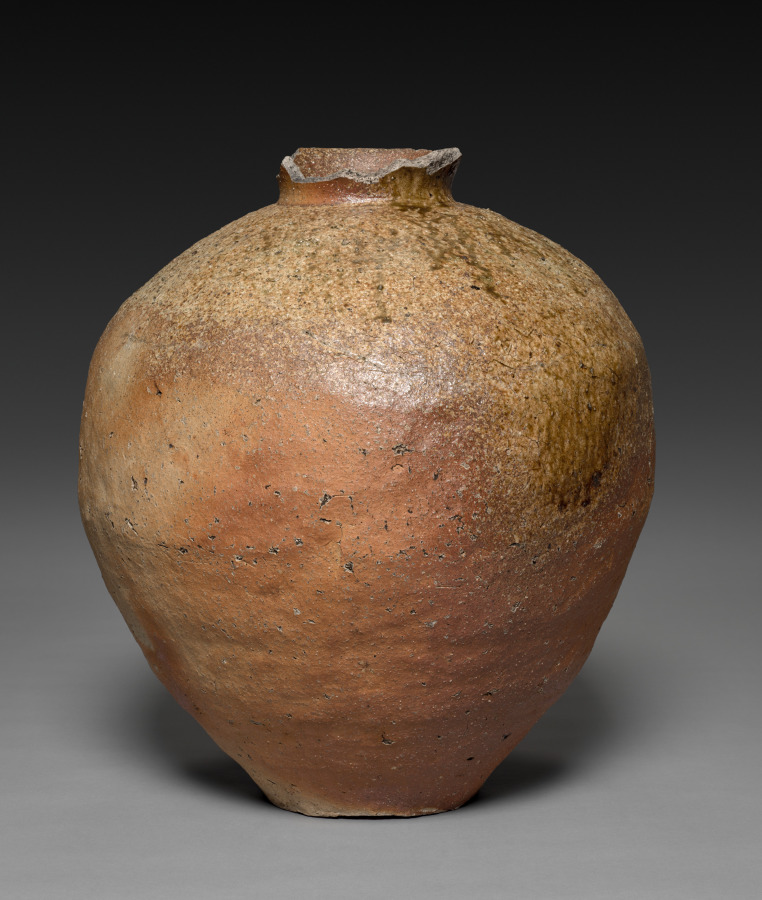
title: Storage Jar (Tsubo)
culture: Japan, Muromachi period (1392–1573)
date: 1400s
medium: stoneware with natural ash glaze (Shigaraki ware)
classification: Ceramic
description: This bulbous clay jar, with its expansive, dry orange-brown surface, white dots of feldspathic stone, and spidery crazing marks epitomizes one type of medieval ware from Shigaraki. This region east of Kyoto and north of the older cultural and religious center of Nara has long been known as a source of superior clay material. Shigaraki storage jars were crafted for strength and durability. The vessel's slightly lopsided shape shows precisely where its three lower clay sections connect with one another. The "stubble" on the upper shoulder sections is highlighted by dripping rivulets of dull-green ash glaze in one small area on the broken neck. The same natural glaze runs over the slope of the shoulder and also appears as a large splash of thin, glossy olive green where the shoulder joins the upper body.